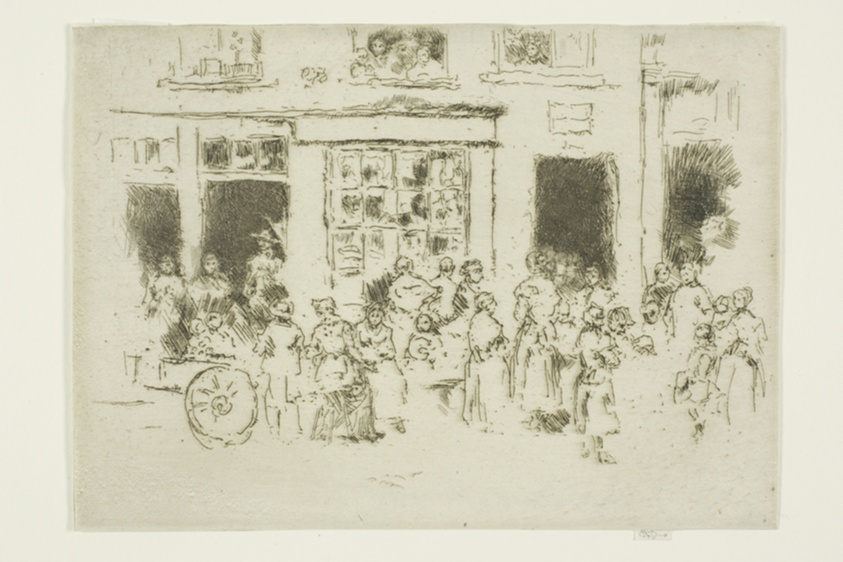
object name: Print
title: High Street, Brussels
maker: James McNeill Whistler (American, 1834-1903)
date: 1887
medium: Etching with foul biting in black ink on ivory laid paper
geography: United States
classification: etching; foul biting; print; prints and drawing; paper